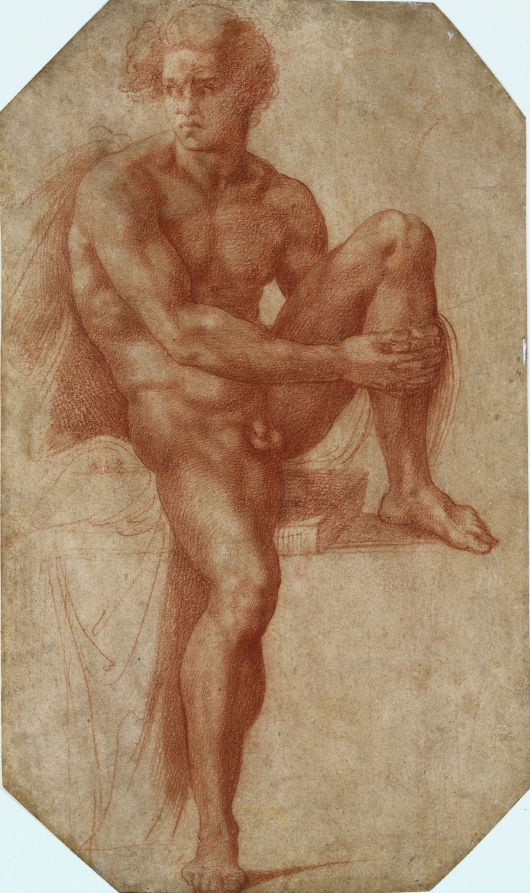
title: Seated Male Nude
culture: Italy, 16th century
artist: Baccio Bandinelli (Italian, 1493–1560)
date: c. 1516–20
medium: red chalk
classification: Drawing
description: Both Baccio Bandinelli and Michelangelo made figure drawing the foundation of their artistic and inventive processes. In this drawing, Bandinelli reimagined one of Michelangelo’s ignudi, the athletic male nudes that decorate the Sistine Chapel ceiling. Probably drawing from a live model, Bandinelli combined controlled, defined lines and smudges to create a massively muscled form, that, like Michelangelo’s figures, refers to ancient sculpture as well as to knowledge of anatomy. His use of red chalk—Michelangelo’s preferred medium for sketching the ignudi—suggests that he sought to compare his own prowess in the medium to that of the better-known master.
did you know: Bandinelli's drawing of a moody nude combines his knowledge of ancient sculpture and paintings by Michelangelo with observation from life.